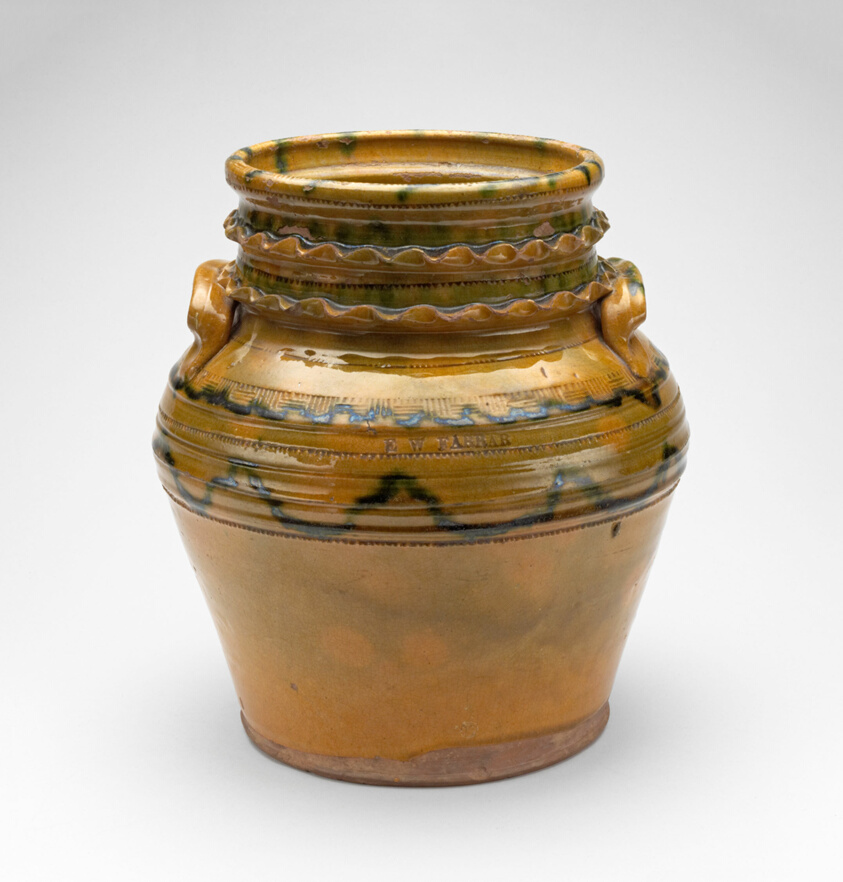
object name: Ceramics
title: Jar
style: Folk Art, studio pottery, 19th century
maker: Edward William Farrar (American, 1808-1845); Middlebury, Vermont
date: c. 1830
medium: Earthenware and glaze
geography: Middlebury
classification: vessel; pottery; ceramics; decorative arts; american decorative arts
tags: dining, drinking